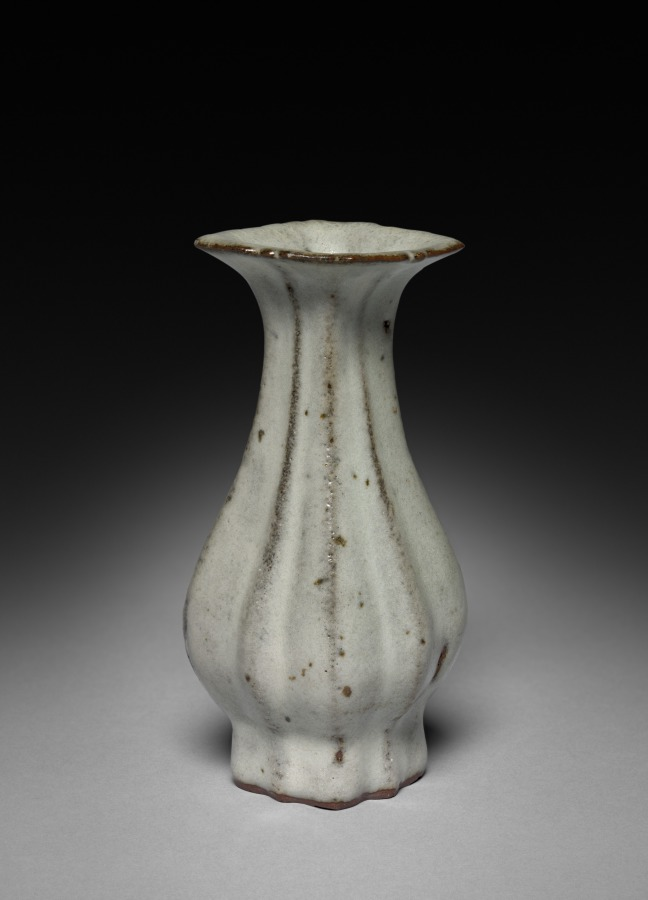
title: Lobed Vase: Guan ware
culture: China, Hangzhou, Suburban Altar Kiln, Southern Song dynasty (1127-1279)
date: 1127–1279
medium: glazed reddish-brown porcelain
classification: Ceramic